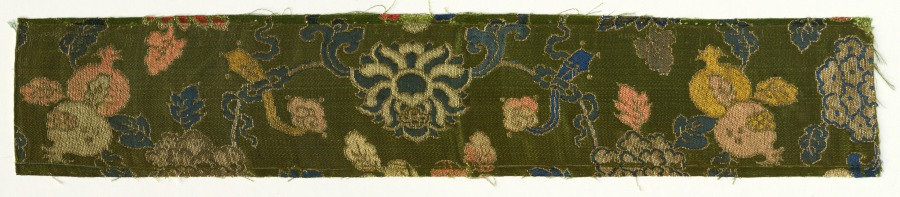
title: Fragment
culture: China, 19th century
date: 1800s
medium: silk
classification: Textile